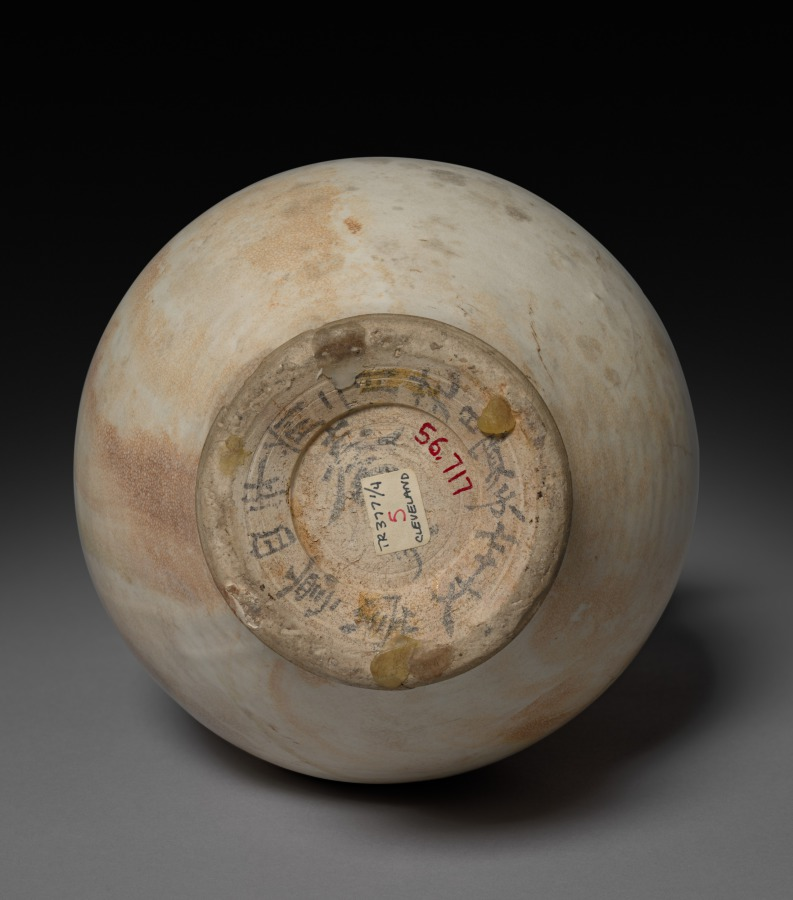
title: Ewer: Cizhou ware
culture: China, Northern Song dynasty (960-1127)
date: 1105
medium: buff stoneware with underglaze slip coating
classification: Ceramic